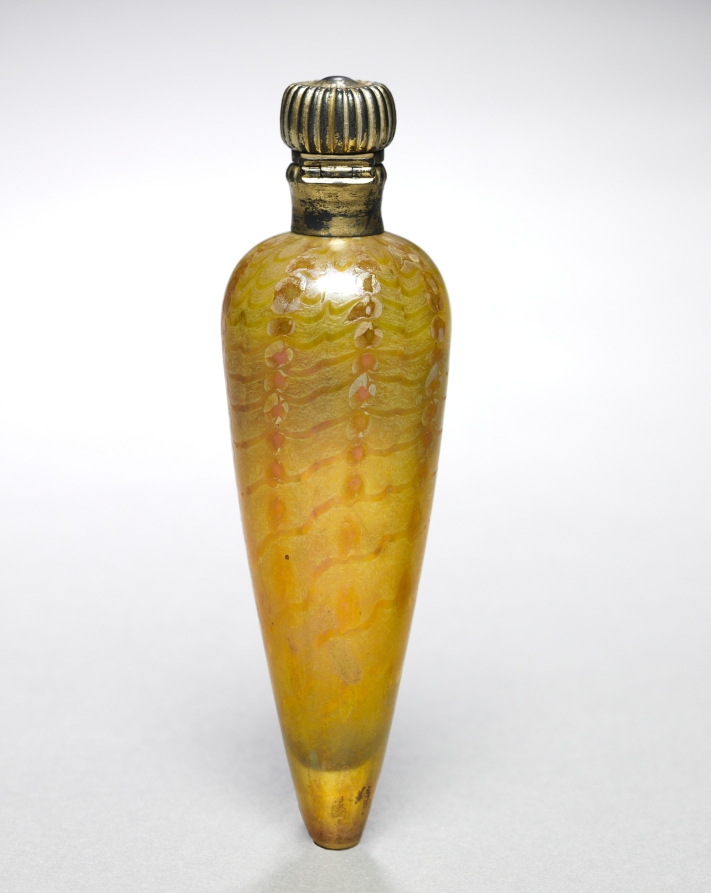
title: Perfume Bottle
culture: America, early 20th Century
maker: Tiffany Studios (United States, New York, 1902–32)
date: c. 1905–10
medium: favrile glass, gilt metal cover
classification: Glass